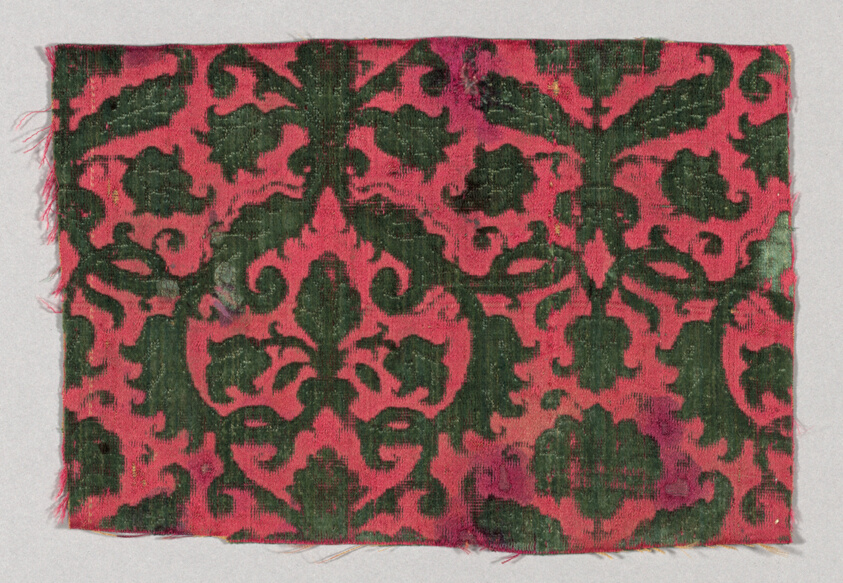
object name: Textile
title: Fragment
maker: Italy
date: early 17th century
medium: Silk, satin weave with supplementary pile warps forming cut, uncut, and voided velvet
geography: Italy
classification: textile; weaving - velvet; weaving